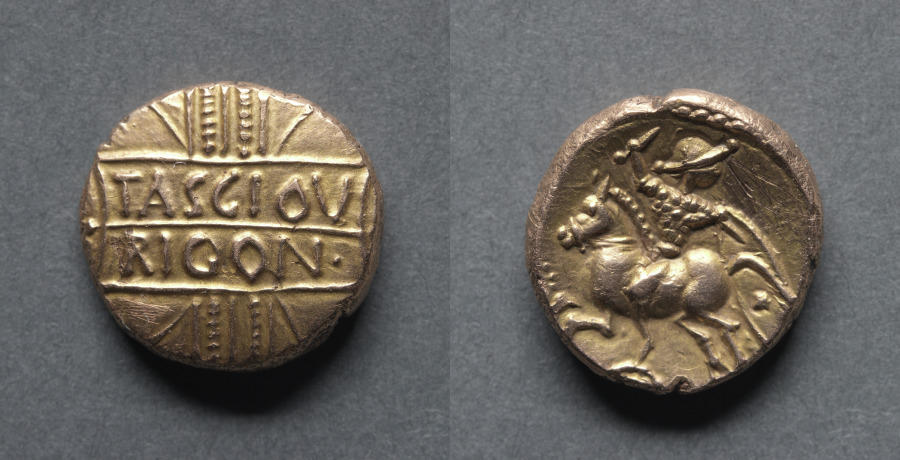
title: Tasciovanus Stater: Wreath (obverse); Horse and Armed Rider (reverse)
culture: England, Catuvellauni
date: c. 20 BCE–10 CE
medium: gold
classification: Coins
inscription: TASCIOV RICON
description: The clarity of the obverse legend sets this piece beyond all doubt. The meaning of RICON, which on some other specimens occurs as RICONI or RIGON, is uncertain. Some authorities believe it to be the Celtic form of REX or king. A high quality or workmanship, the horse has a clear, three-dimensional appearance. The warrior's cuirass is a point of interest as it may show mail being used. The warrior's shield is on his outstretched left arm, trailing behind the horse as the rider turns in his saddle, probably encouraging his army.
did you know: The name Tasciovanos is only known through coin and appears to have become king of the Catuvellauni around 20 BC.